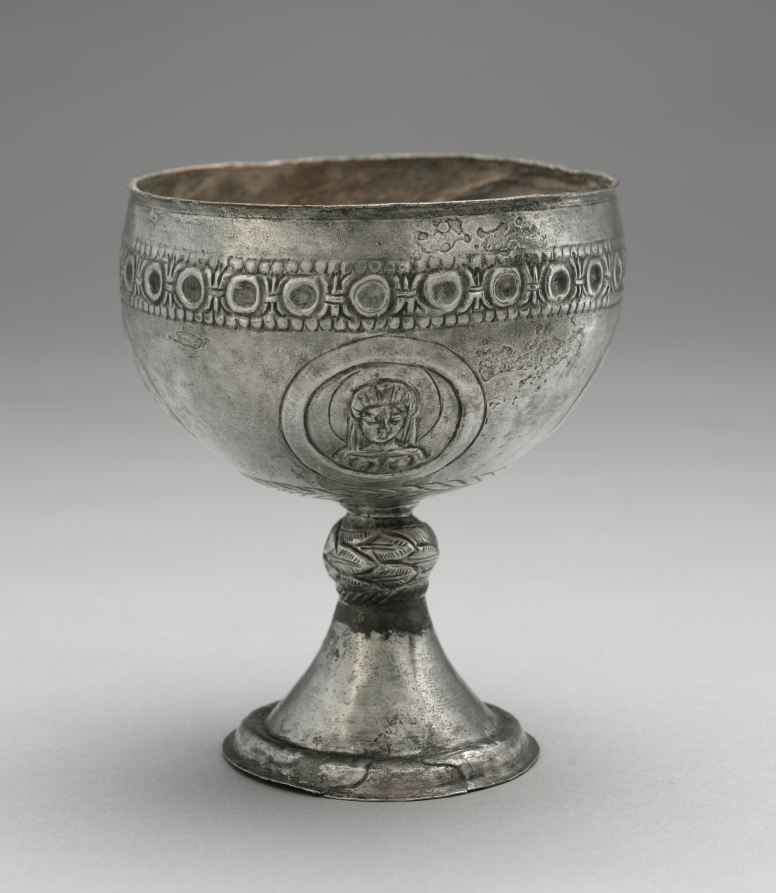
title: Chalice from the Beth Misona Treasure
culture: early Byzantium, Constantinople or Syria, Byzantine period, 6th-7th Century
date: c. 500–700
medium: silver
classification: Metalwork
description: These four liturgical silver vessels—a paten and three chalices (1950.378–81)—form what is now called the Beth Misona Treasure, named for the village in northern Syria for which the objects were made. While nothing is known about the exact location and circumstances of the treasure's discovery, the people of the village of Beth Misona were, like other Christian communities in Syria and Palestine, probably forced to bury their church silver to hide it from the Persians or Arabs, who conquered their lands in the first half of the 600s. The paten, which held pieces of Eucharistic bread used during Mass, is decorated with an engraved Latin cross surrounded by a dedicatory inscription that names the paten's donor—Domnos—and its original location, the church of Saint Sergios in Beth Misona. The chalices, which contained the Eucharistic wine used during Mass, feature broad cups decorated with portrait busts of Saints Peter and Paul, Christ, and the Virgin. One chalice bears a dedicatory inscription naming its donor—Kyriakos, Domnos's son—and the priest of the church that received the pious gift—Zeno.